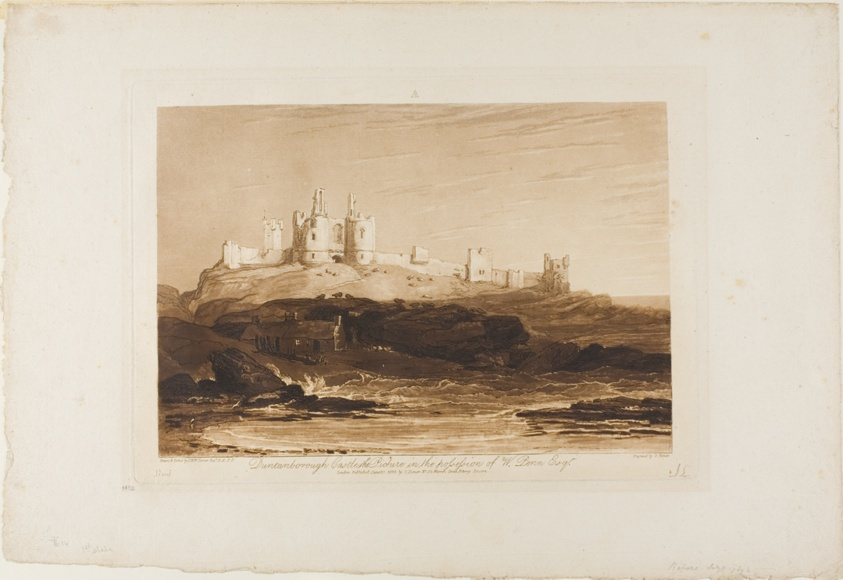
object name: Print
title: Dunstanborough Castle, plate 14 from Liber Studiorum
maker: Joseph Mallord William Turner (English, 1775-1851); Engraved by Charles Turner (English, 1773-1857)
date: published June 10, 1808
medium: Etching and engraving in brown on ivory paper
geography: England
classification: etching; print; prints and drawing